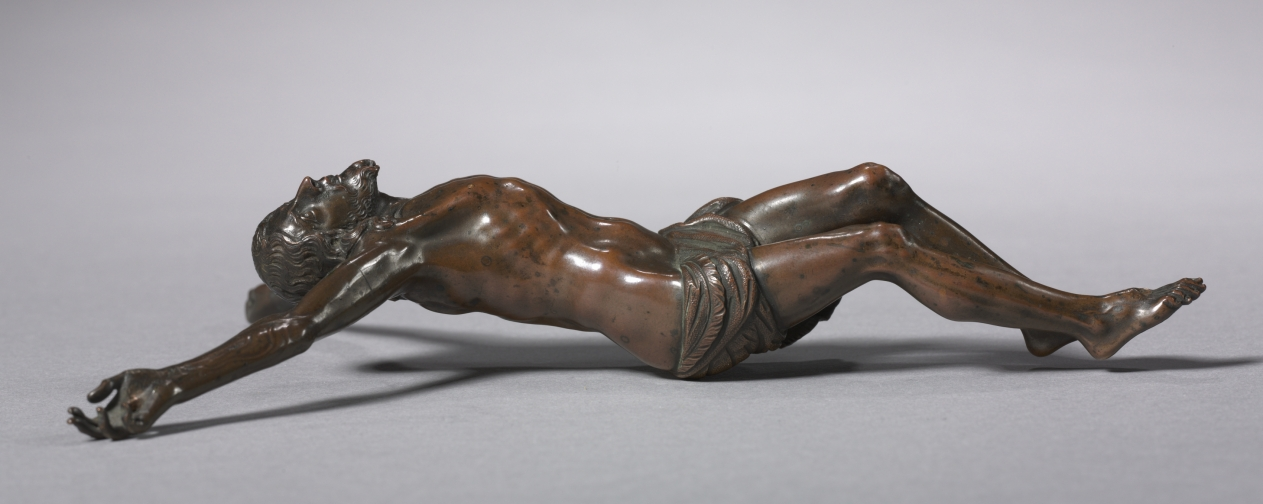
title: Christ Crucified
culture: Italy, Florence(?), 17th century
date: c. 1600–1650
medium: bronze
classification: Sculpture